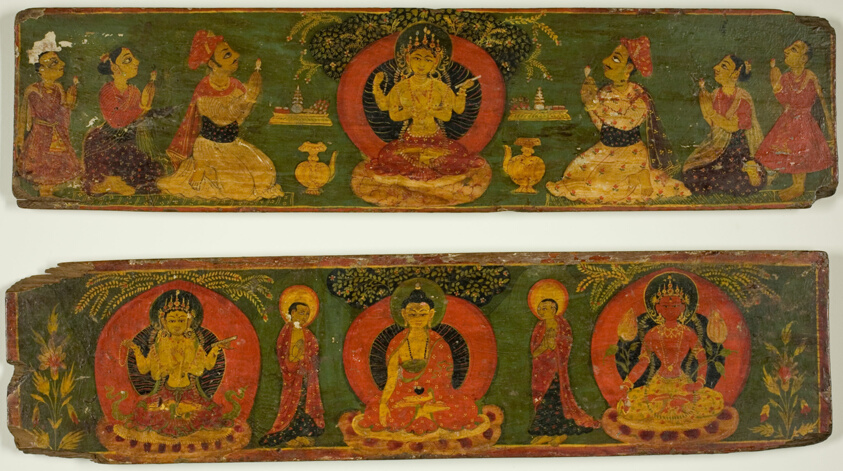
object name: Painting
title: One of a Pair of Manuscript Covers from the Perfection of Wisdom Sutra (Ashtasahasrika Prajnaparamita Sutra)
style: Himalayan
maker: Nepal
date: c. 17th century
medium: Pigments and metallic paint on wood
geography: Nepal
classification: painting; manuscript